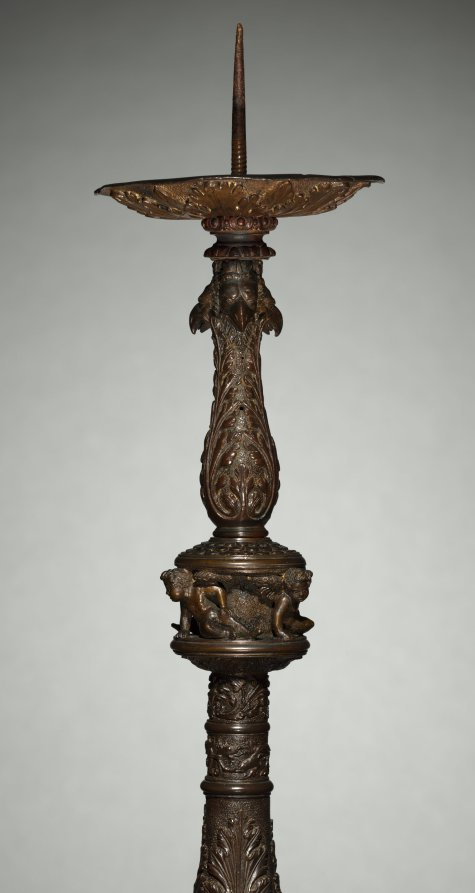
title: Paschal Candlestick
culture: Northern Italy, possibly Padua, 16th century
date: c. 1525–1550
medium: bronze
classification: Sculpture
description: In Roman Catholic practice, a large candlestick holds the Paschal Candle, blessed and lit for the first time on Easter eve, then used on significant occasions throughout the year. Despite its religious function, the decorations here are entirely secular-ranging from panthers and bound satyrs to the heads of raptors and goats. These elements derive from ancient Roman sculpture and were especially popular among intellectuals in northern Italy, who were actively exploring connections among pagan traditions, ancient philosophy, and Christianity.